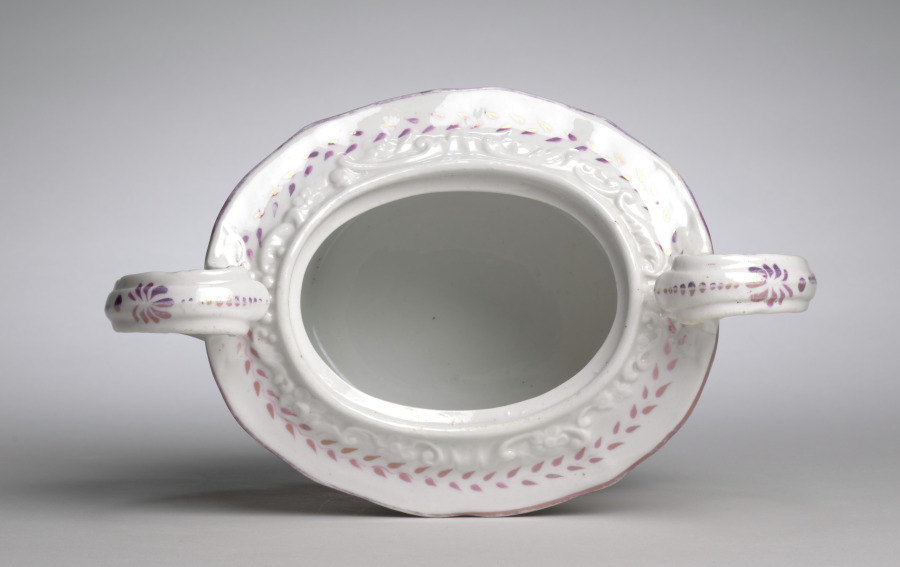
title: Sugar Bowl and Lid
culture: England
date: c. 1800–1825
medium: earthenware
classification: Ceramic